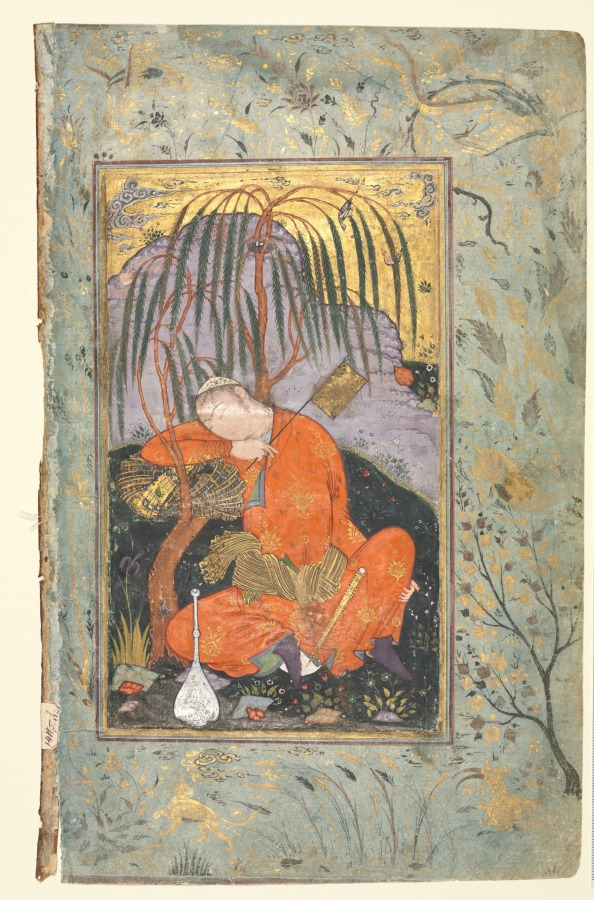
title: Persian Couplets (recto); Sleeping Youth (verso)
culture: Iran, Isfahan, Safavid period (1501-1722)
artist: style of Riza-yi Abbasi (Iranian)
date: late 1500s–early 1600s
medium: ink, gold, and opaque watercolor on paper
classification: Manuscript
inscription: script: Nasta'liq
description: Under Shah Abbas, the tradition in which painting was employed to illustrate a literary work was all but abandoned. In its place came a new concern with single-page illustrations, such as this one, which have no specific content or meaning. They often illustrate albums of collections of verses about love and beauty, in which these themes often appear to serve as allegories of things divine.